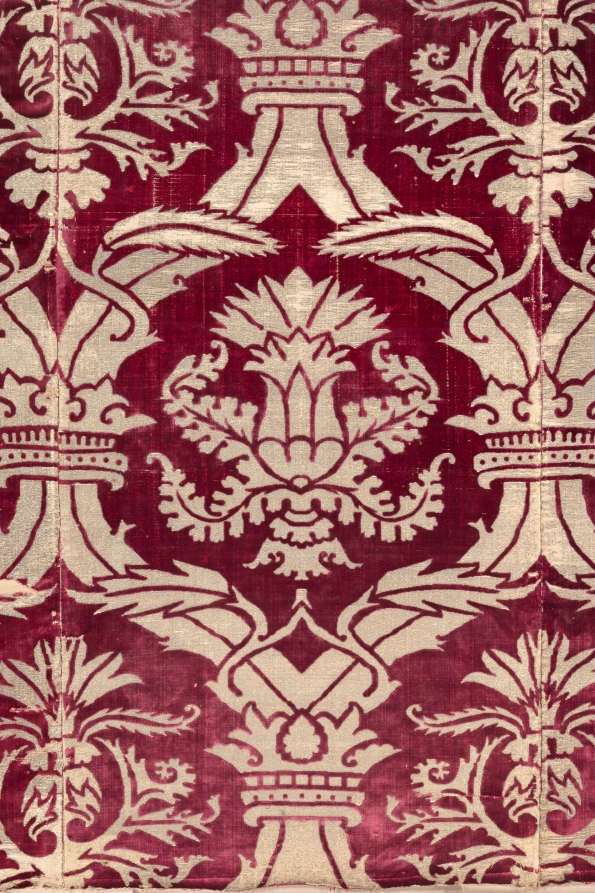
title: Brocaded Velvet Panel with Italianate Pattern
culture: Turkey, Istanbul or Bursa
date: 1575–1625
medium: Silk: velvet, brocaded; gilt-metal thread and cotton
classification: Velvet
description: Rarely are four fabric widths preserved together from any culture. This gilt-metal thread pattern combines Turkish and Italian features: the large ogival (curved) lattice clasped by crowns and the velvet structure are Turkish, and the two so-called artichoke designs are enlarged adaptations of Italian motifs. A symbol of wealth and power, this velvet panel was woven during the artistic height of the Ottoman Empire in the late 1500s. It may have covered a divan (sofa) or possibly enhanced a wall during cold winters in the imperial Topkapi Palace in Istanbul.